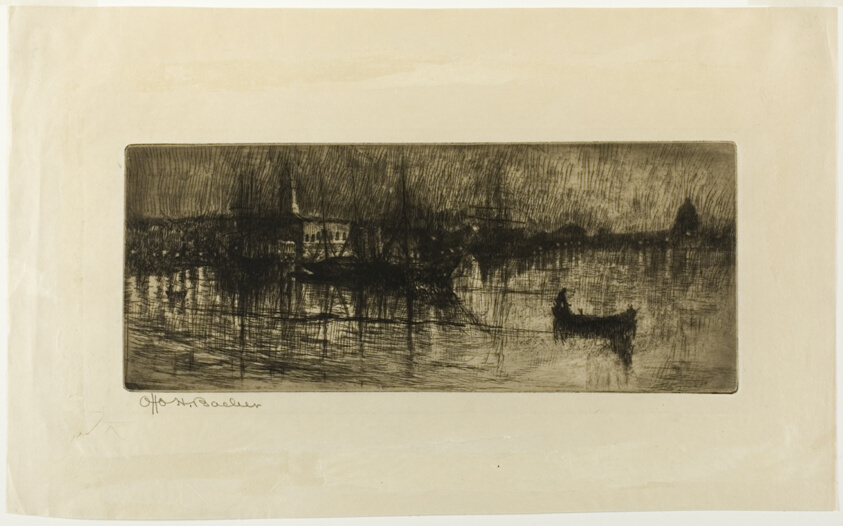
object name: Print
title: Rainy Night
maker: Otto Henry Bacher (American, 1856-1909)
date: 1880/ 1882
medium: Etching on cream China paper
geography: United States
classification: print; etching; prints and drawing